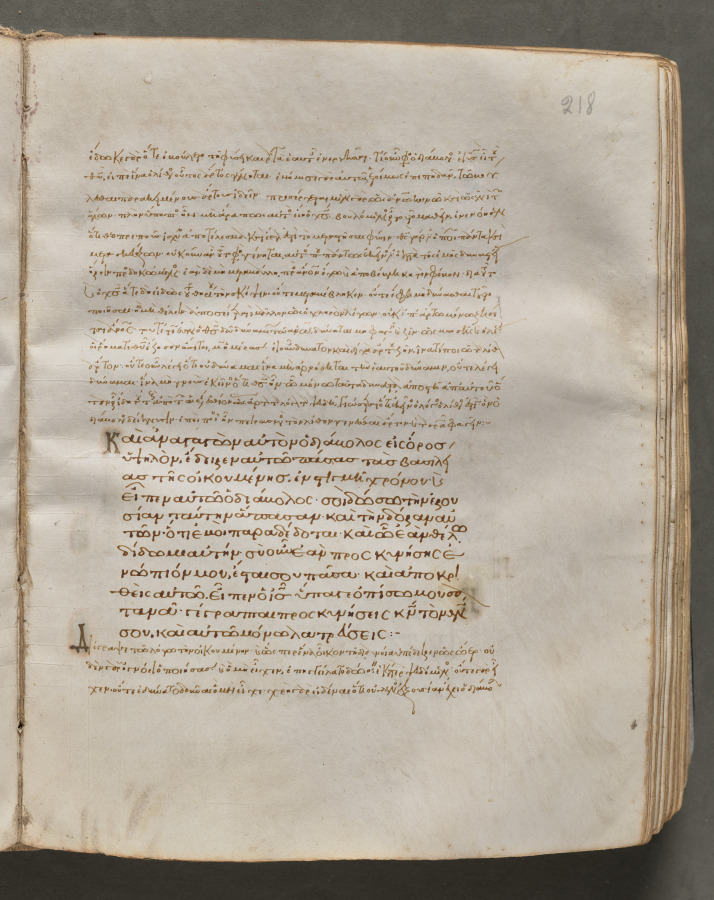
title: Text, folio 218 (recto), from a Gospel Book with Commentaries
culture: Byzantium, Constantinople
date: c. 1000–1100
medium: ink, tempera, and gold on vellum; leather binding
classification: Bound Volume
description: Each of the four gospels in this book opens on a page with brilliantly illuminated borders depicting the author of the text as well as birds-principally peacocks, symbols of the immortality of the soul-and fountains, representing the fountain of life and the salvation of the soul. This volume consists of 428 leaves with texts in Greek. Its level of sophistication suggests that it was probably written and decorated in a monastery in Constantinople.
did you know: Gospel Books were carried in procession through Byzantine churches.